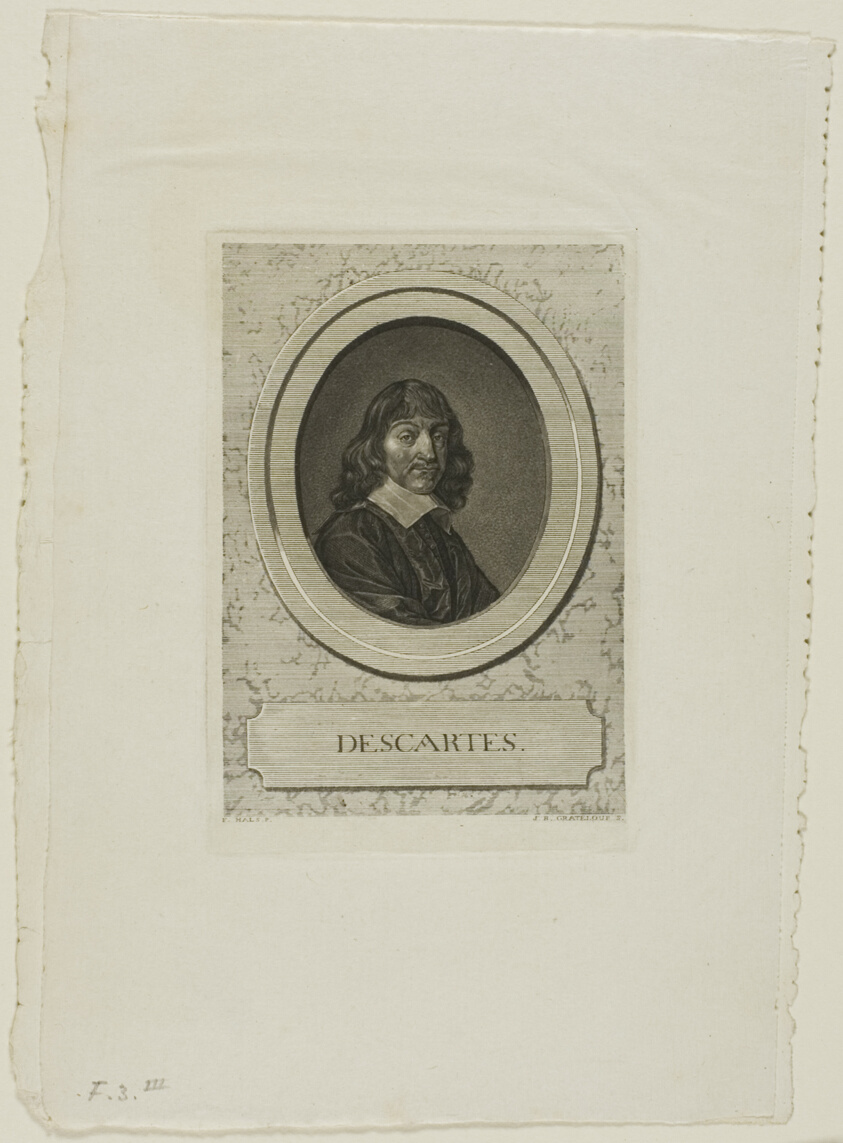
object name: Print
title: Descartes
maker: Jean-Baptiste de Grateloup (French, 1735-1817)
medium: Engraving on paper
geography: France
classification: engraving; print; prints and drawing